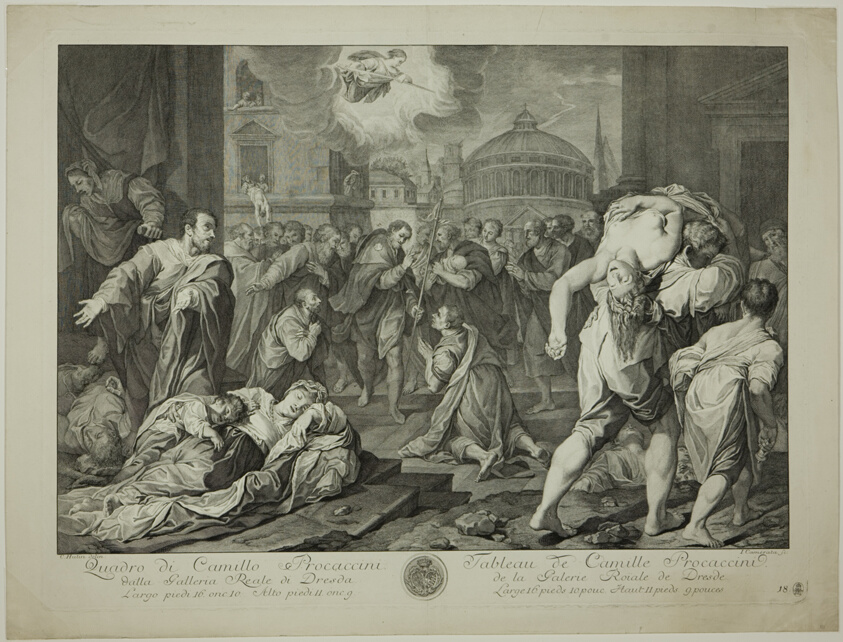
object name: Print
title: Saint Roch Healing Sufferers from the Plauge, from Recueil d'estampes d'après les plus célèbres tableaux de la Galerie Royale de Dresde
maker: Giuseppe Camerata (Italian, 1718-1803); after Camillo Procaccini (Italian, c. 1555-1629); after Charles François Hutin (French, 1715-1776)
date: c. 1750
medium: Etching with engraving on paper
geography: Italy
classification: etching; print; prints and drawing; paper